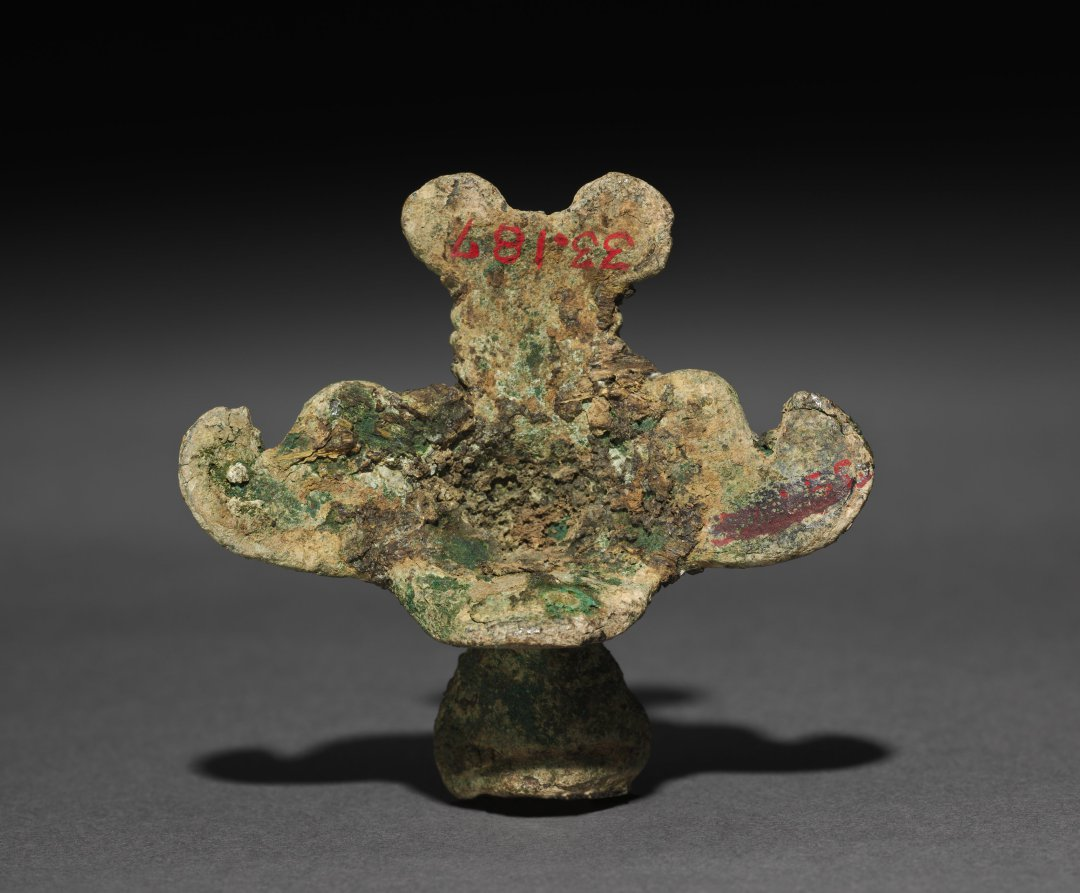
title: Ornament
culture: Parthian Empire (247 BCE–224 CE)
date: 1–200 CE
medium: bronze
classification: Metalwork